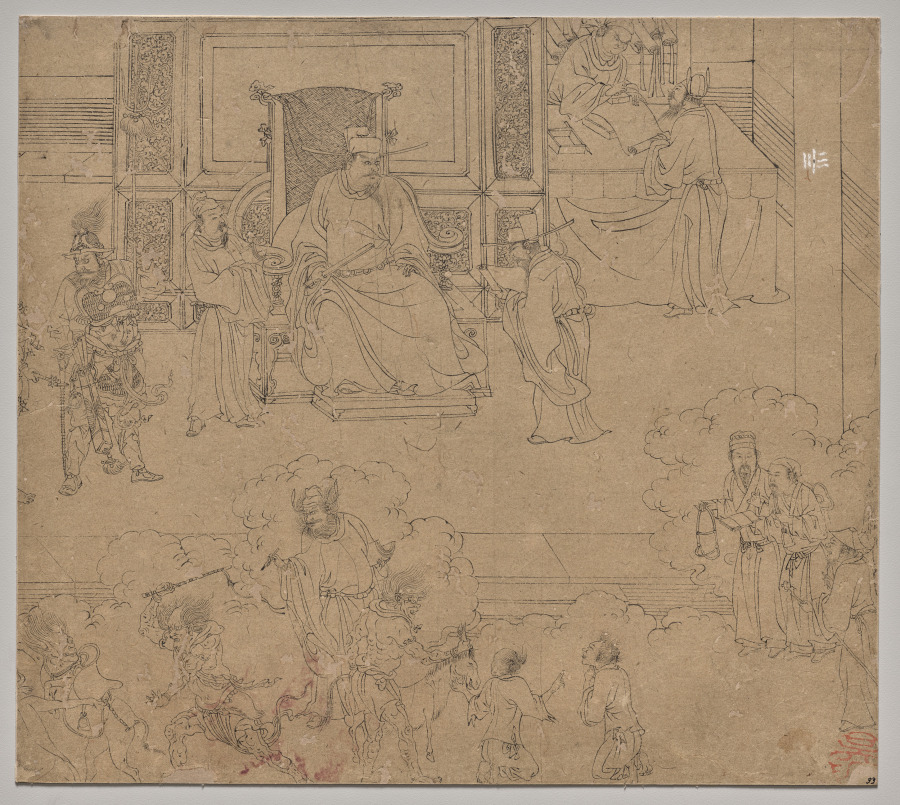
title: Album of Daoist and Buddhist Themes: Kings of Hells: Leaf 33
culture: China, Southern Song dynasty (1127-1279)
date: 1200s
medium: Album, ink on paper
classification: Painting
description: This extraordinary album has 50 paintings on a variety of religious subjects. They were likely created by several master craftsmen to share with studio apprentices as models for fulfilling commissions. The Jade Emperor and the Daoist pantheon make up the first 26 leaves. The next 14 leaves portray the Buddhist Ten Kings of Hell administering punishments to the dead. The third section, called “Clearing the Mountains,” features divine soldiers, led presumably by the deity Erlang Shen 二郎神, fighting undesirable creatures.